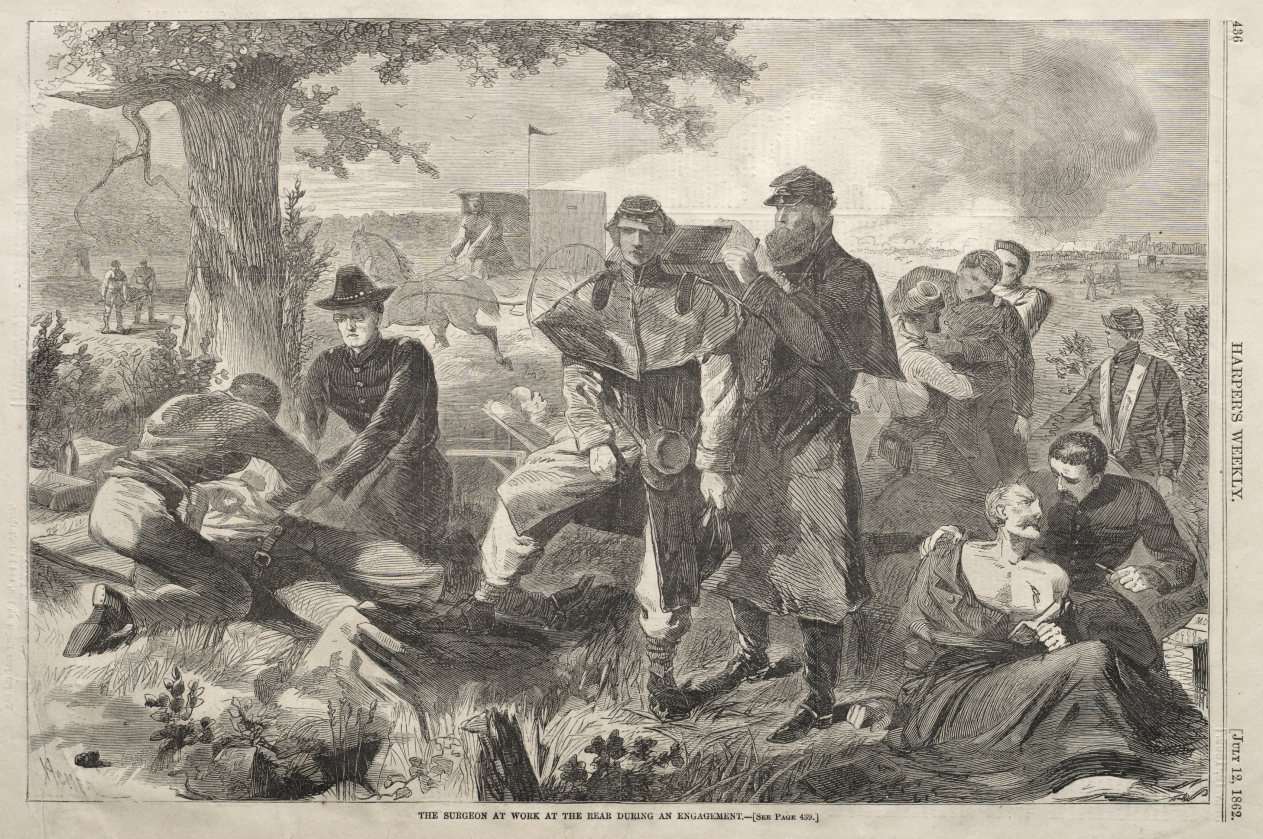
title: The Surgeon at Work at the Rear during an Engagement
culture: America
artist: Winslow Homer (American, 1836–1910)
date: 1862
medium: wood engraving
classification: Print